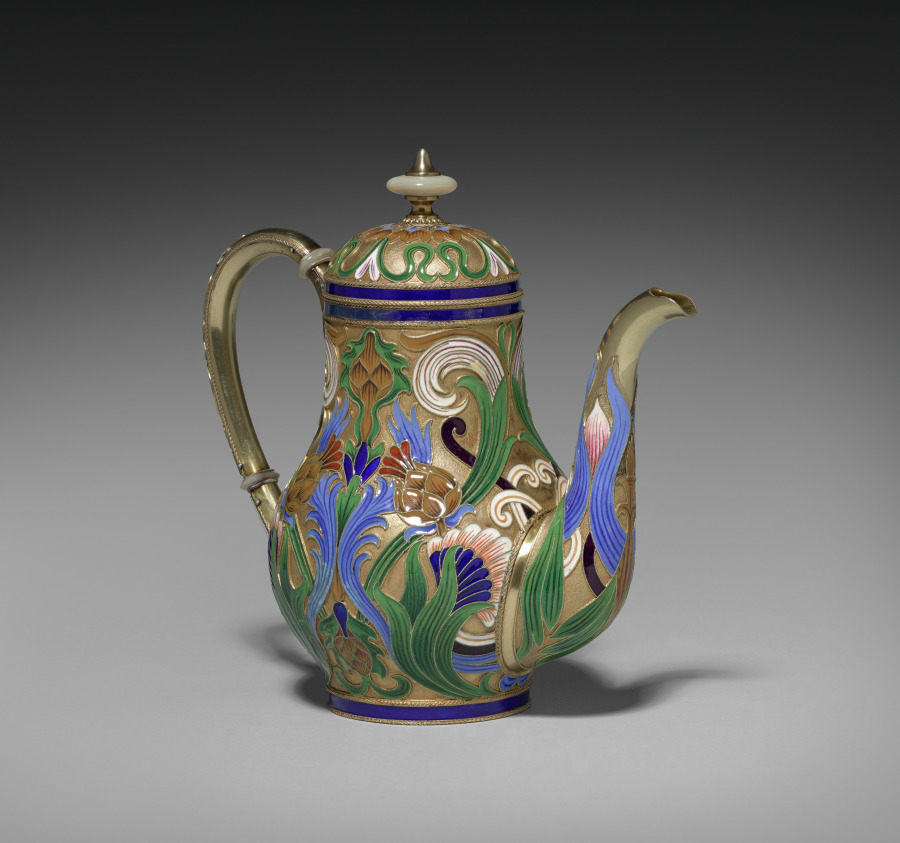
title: Covered Hot Water Pot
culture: Russia, St. Petersburg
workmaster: attributed to Feodor Ivanovich Rückert (Russian, 1840–1917)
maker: House of Fabergé (Russian, 1842–1918)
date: 1887–96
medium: silver gilt, opaque cloisonné enamel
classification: Miscellaneous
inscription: 88, St. George [assay mark for Moscow, 1882-1896]; C. Fabergé (in Cyrillic); double-headed eagle [imperial warrant]; 88; initials of Carl Fabergé (in Cyrillic).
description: Fabergé’s craftsmen in Moscow, especially under the watchful eye of workmaster Feodor Rückert, became known for their work in the pan-Slavic or neo-Russian style, hearkening back to 17th-century motifs of Russian folk art. Often on rather conventional shapes, Rückert and his silversmiths created an explosion of color, achieved through the historic technique of cloisonné enamel in which tiny metal lines are soldered to the surface then filled with glass powders in various colors and fired to create a high gloss finish. The result is a spectacular evocation of the 17th-century originals. Far from mere copies, however, Rückert's designs, such as this tea service, employ naturalistic or abstract motifs in a thoroughly modern adaptation of a remarkable earlier period of Russian art and decoration.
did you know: This covered hot water pot is part of a larger tea set.